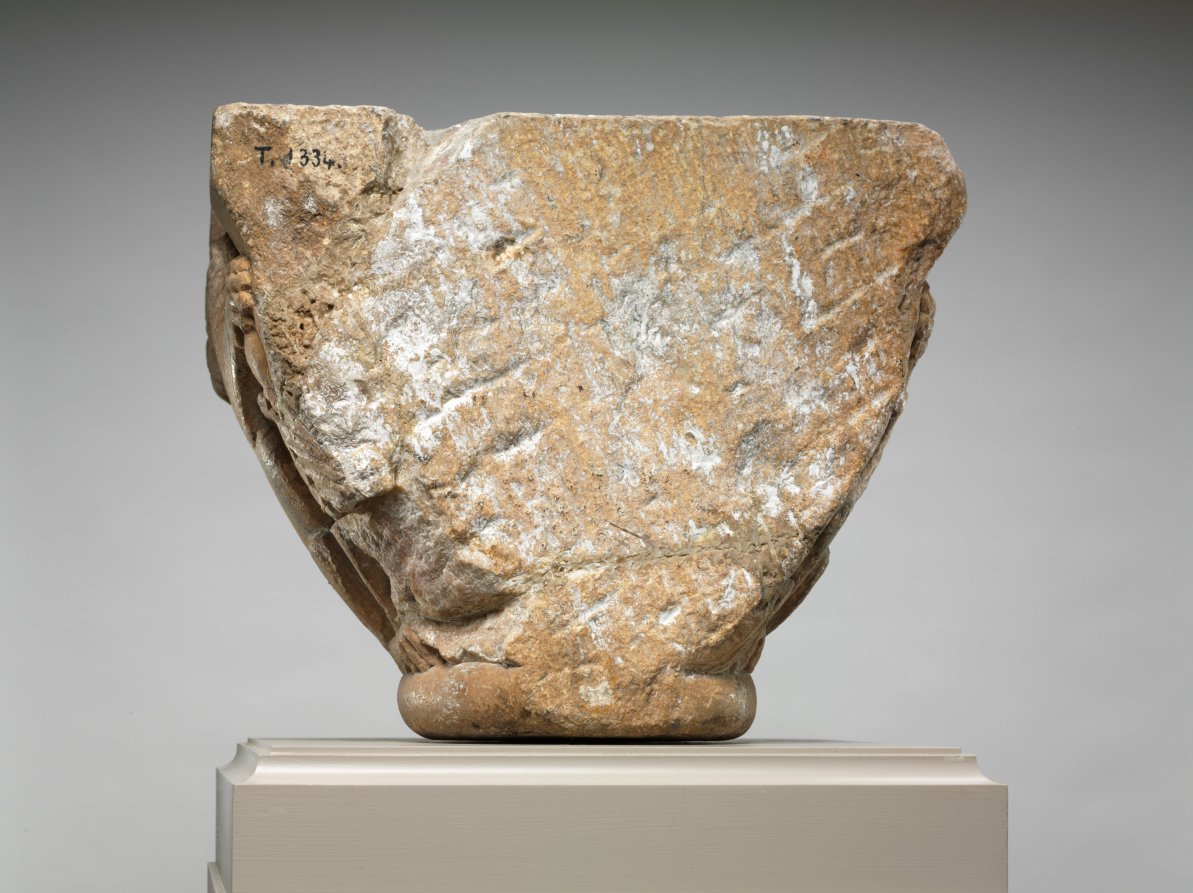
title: Engaged Capital with Lions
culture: Northern Spain (Navarre ?) or Southwest France (Pyrénées or Roussillon ?), mid-12th century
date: 1145–64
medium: marble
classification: Sculpture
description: The compositional motif of confronted and addorsed beasts illustrated on this capital was especially popular in churches along the pilgrimage roads.